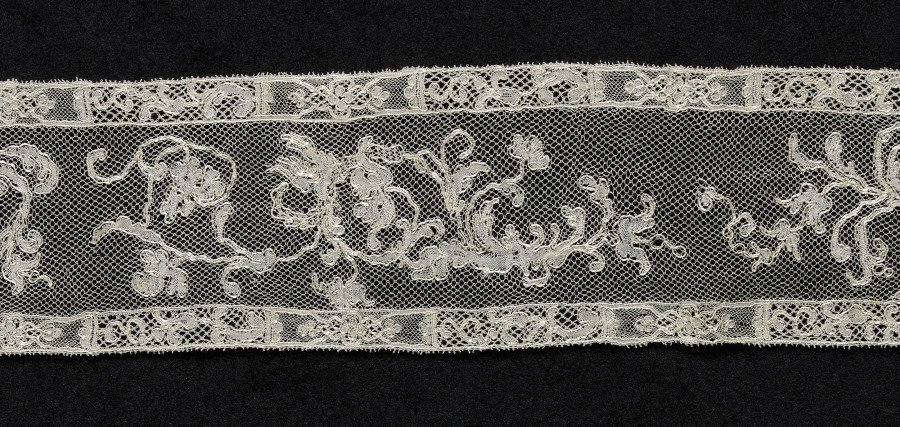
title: Lace Lappet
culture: France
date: 1780–99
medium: Silk: bobbin lace (Mechelen blonde lace)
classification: Lace